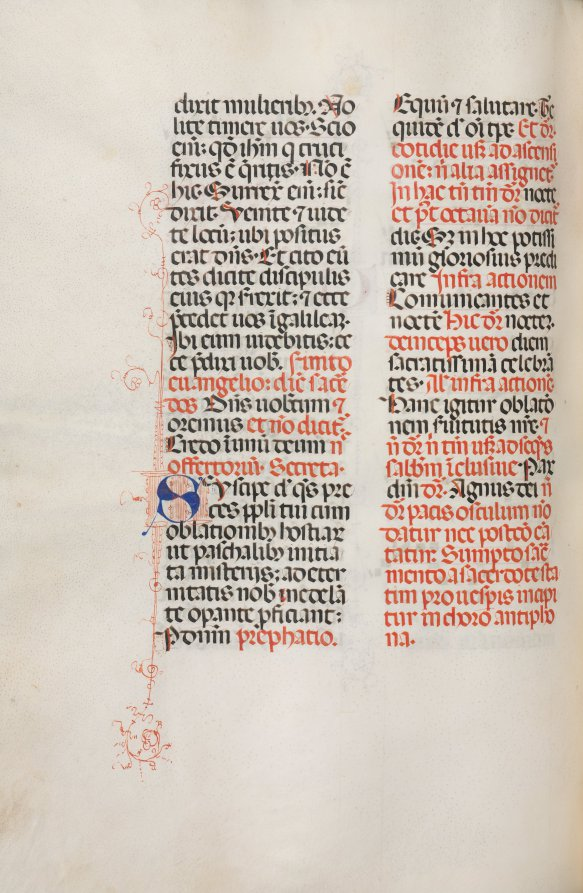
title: Missale: Fol. 172v: Music for "Alleluia" etc. at beginning of Easter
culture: Italy, Perugia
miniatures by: Bartolommeo Caporali (Italian, c. 1420–1503)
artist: assisted by Giapeco Caporali (Italian, d. 1478)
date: 1469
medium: ink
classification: Bound Volume